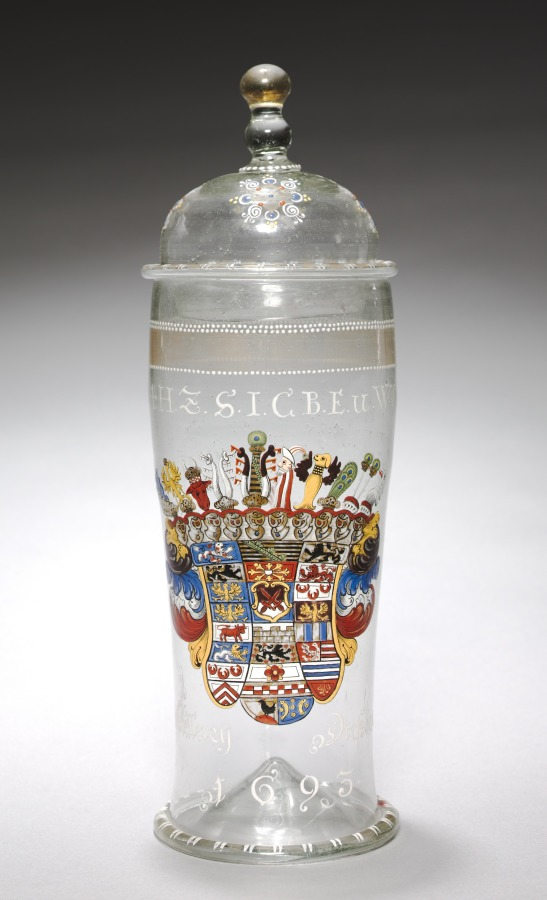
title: Covered Beaker (Humpen)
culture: Germany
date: 1693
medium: enameled glass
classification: Glass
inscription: I[ohann] G[eorg] D[er] 4 H[erzog] z[u] s[achsen] I[ulich] c[leve] B[erg] E[ngern] U[nd] W[estphalia] c[hurfürst]. Below the arms of the duke, in white enamel is the inscription: HOFFKELLEREY, DRESZDEN.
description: This humpen was made for the court cellar (Hofkellerei), Dresden, which belonged to the House of Saxony, showing the arms of Johann IV zu Sachsen.